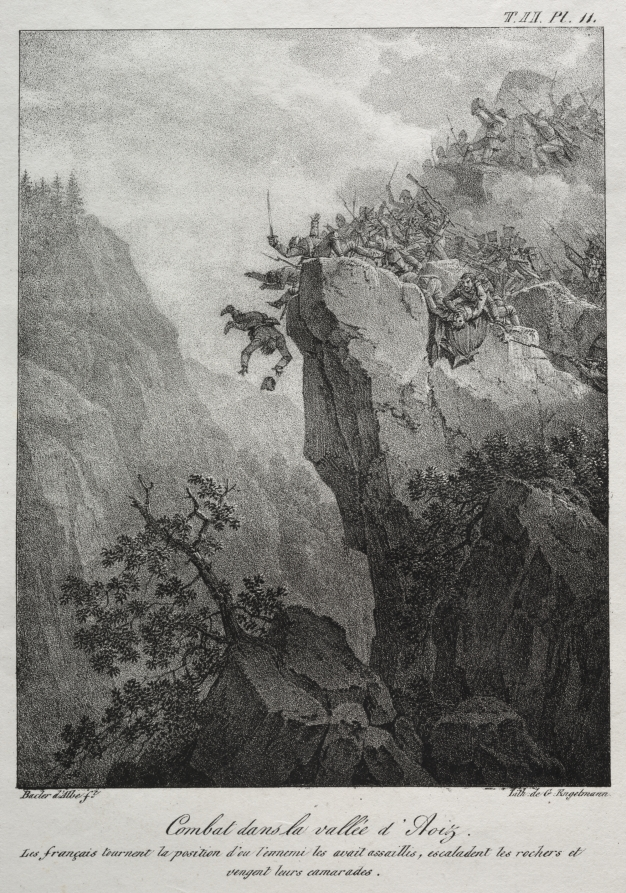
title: Spanish Campaign: Combat in the Aoiz Valley, Province of Navarre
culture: France, late 18th-early 19th century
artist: Baron Louis Albert Guillain Bacler d'Alber (French, 1761–1824)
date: 1807–24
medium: lithograph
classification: Print